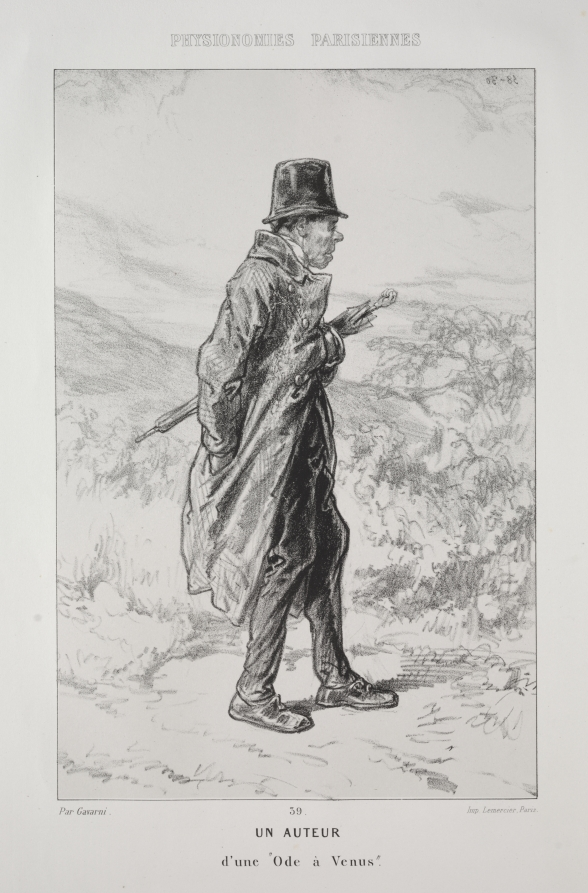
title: Un Auteur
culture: France, 19th century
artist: Paul Gavarni (French, 1804–1866)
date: c. 1858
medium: lithograph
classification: Print